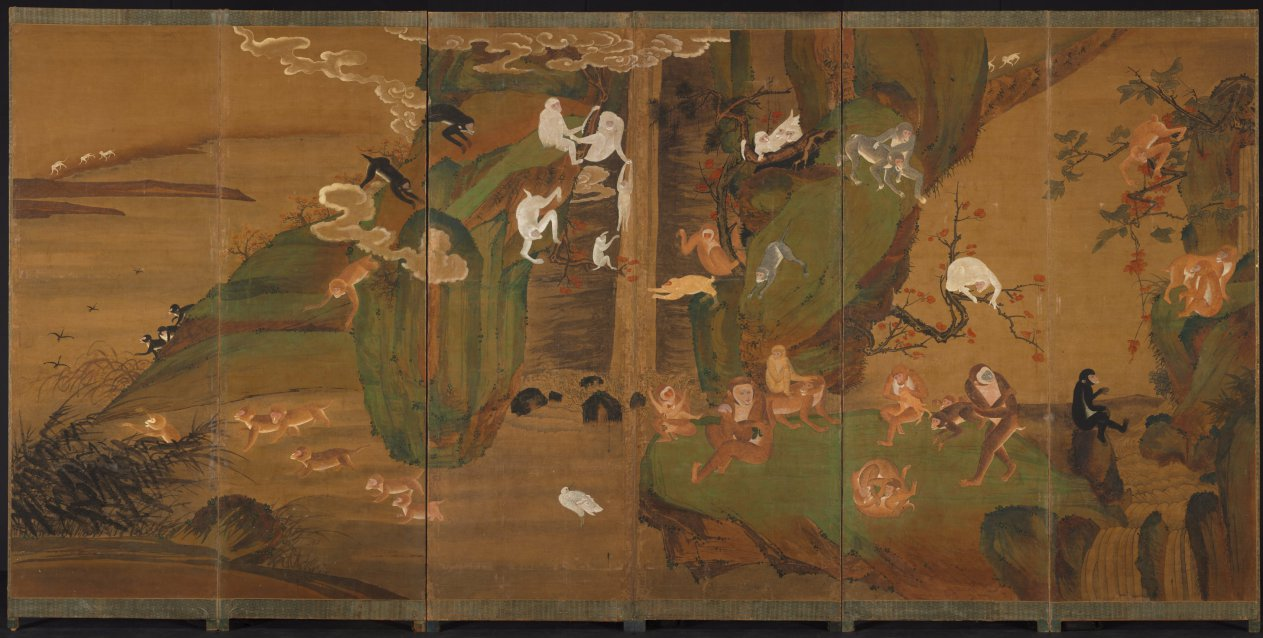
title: Gibbons in a Landscape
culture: Korea, Joseon dynasty (1392–1910)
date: early 1900s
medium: Six-panel folding screen; ink and color on hemp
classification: Painting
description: In this folding screen, gibbons playfully interact with each other. In Korean paintings, gibbons were less frequently depicted than in their Chinese and Japanese counterparts. However, they became popular toward the end of the 1800s, possibly due to an influx of Chinese and Japanese decorative arts. Gibbons symbolize good fortune, but as paired with the red autumn foliage, specifically refer to professional success, such as passing the government examination and getting promoted to a higher position. The large ripe peach held by one gibbon bears another symbolic meaning: prosperity and longevity.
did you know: Gibbons were often presented to the Joseon royal court as diplomatic gifts from the Japanese government.